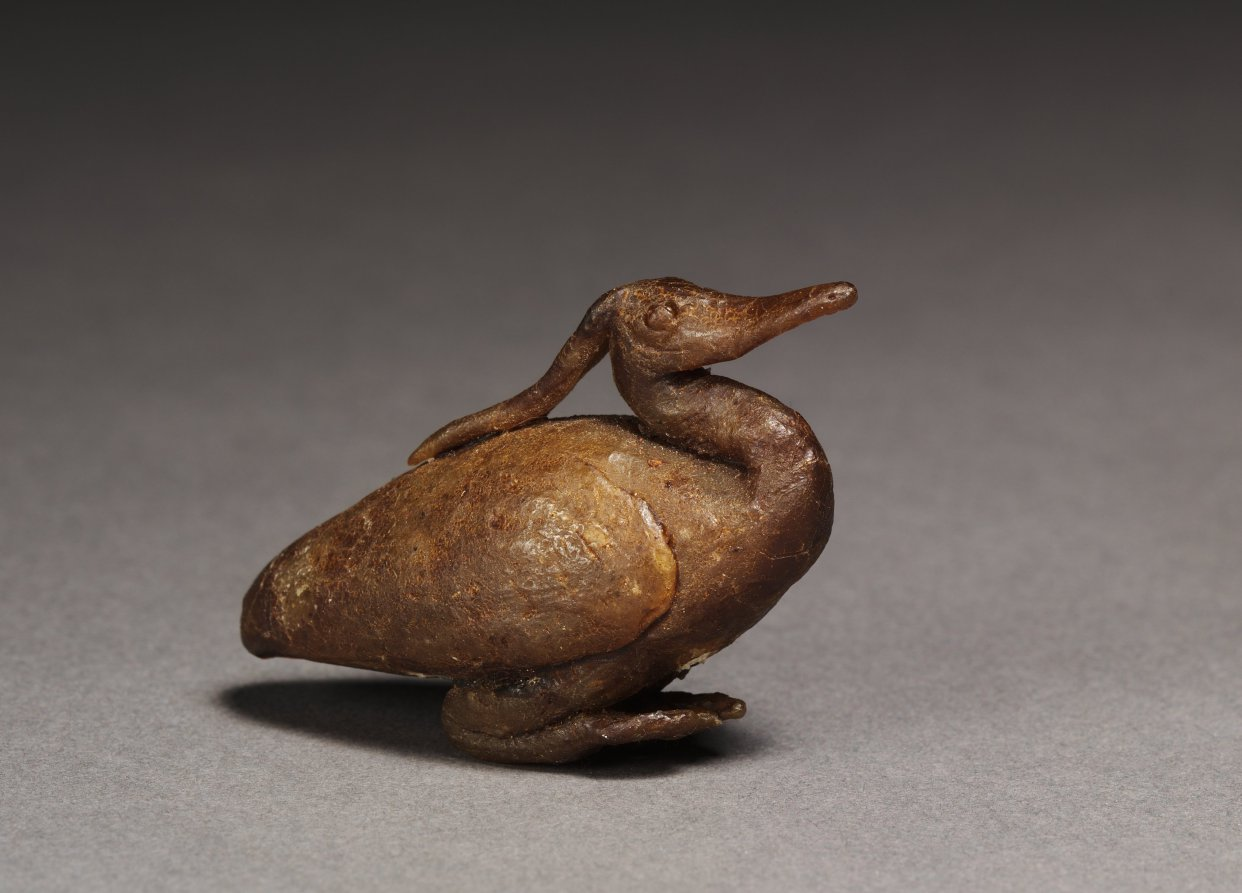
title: Benu-bird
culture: Egypt, Third Intermediate (1069–715 BCE), Dynasties 21–22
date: 1000–500 BCE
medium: honey-colored wax with dark amber varnish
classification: Funerary Equipment